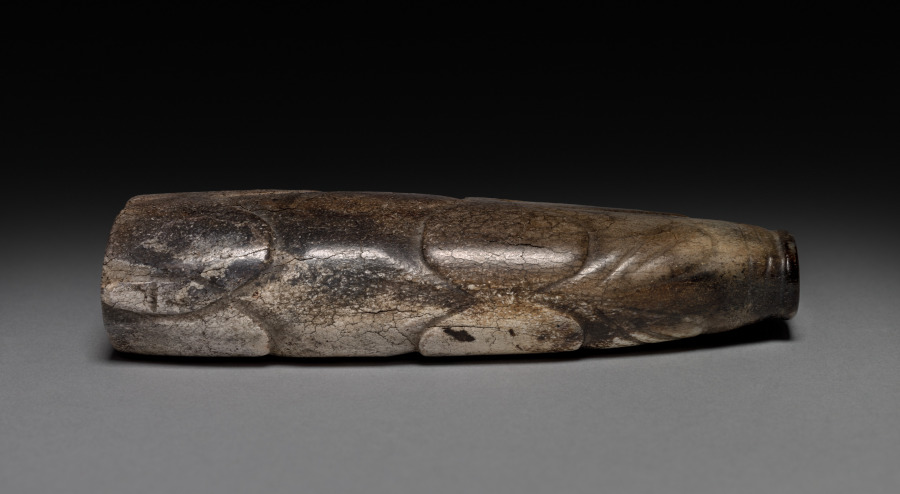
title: Pig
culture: China, Zhou dynasty (c. 1046–256 BCE)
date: 1045–256 BCE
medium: jade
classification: Jade